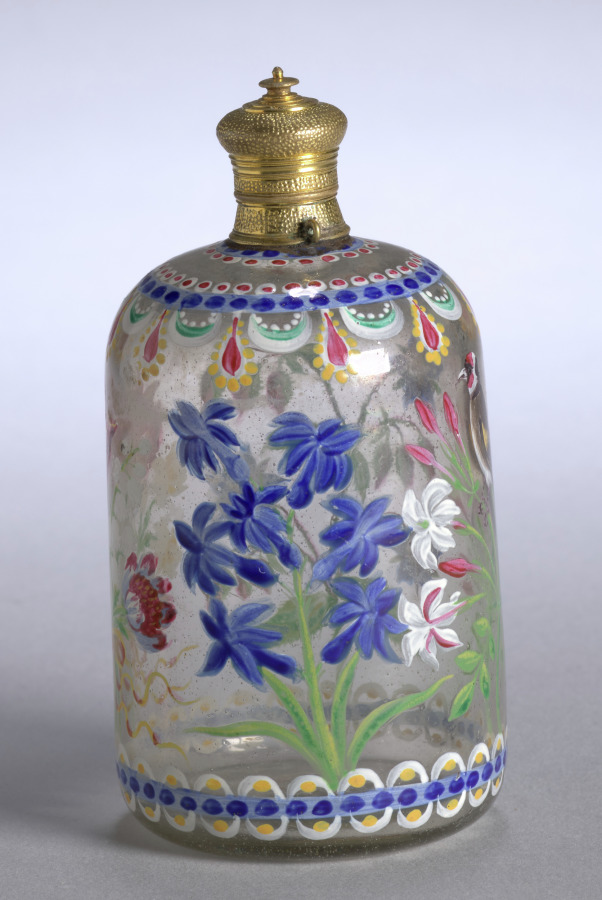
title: Scent Bottle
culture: Germany, 18th century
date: 1700s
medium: glass with enamel decoration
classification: Miscellaneous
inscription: signed: Z. F. a M.